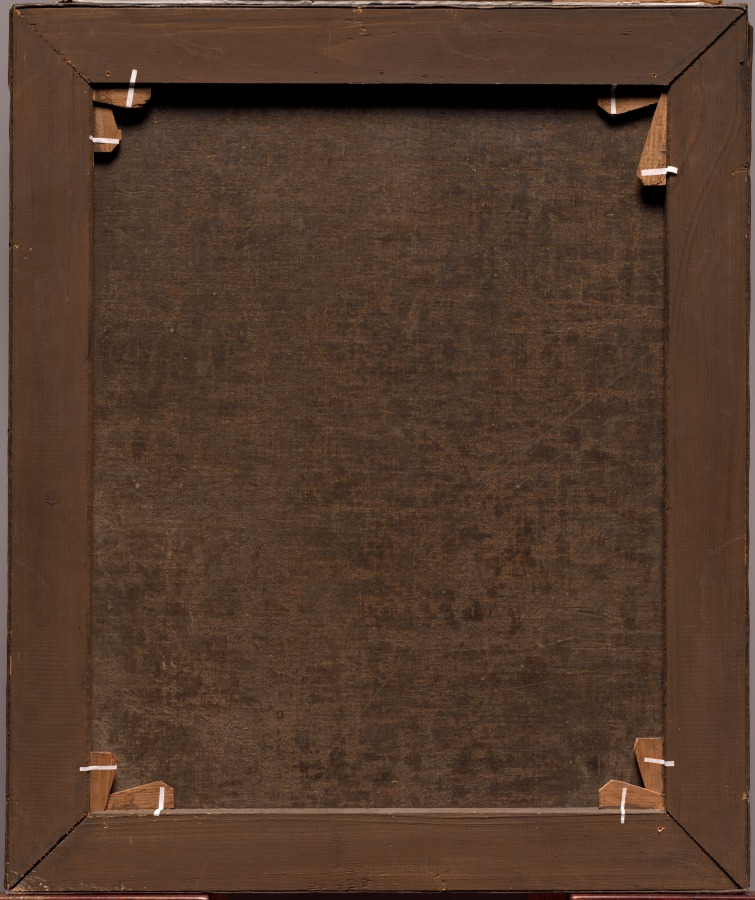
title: Violin Player with a Wine Glass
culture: Netherlands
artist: Dirck van Baburen (Dutch, c. 1595–1624)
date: 1623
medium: Oil on canvas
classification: Painting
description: Baburen, a native of Utrecht, was among the first to introduce Caravaggio’s revolutionary style to the Netherlands. Half-length figures positioned close to the picture plane project a lively spontaneity. This musician’s loose, colorful dress marks him as a figure at the edges of society, unbound by behavioral norms—associations enhanced by his bold gaze, unshaven face, and cheeky grin complete with broken tooth.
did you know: Other paintings by Utrecht artists feature the same model, whose extravagant mustache and broken tooth make him instantly recognizable.